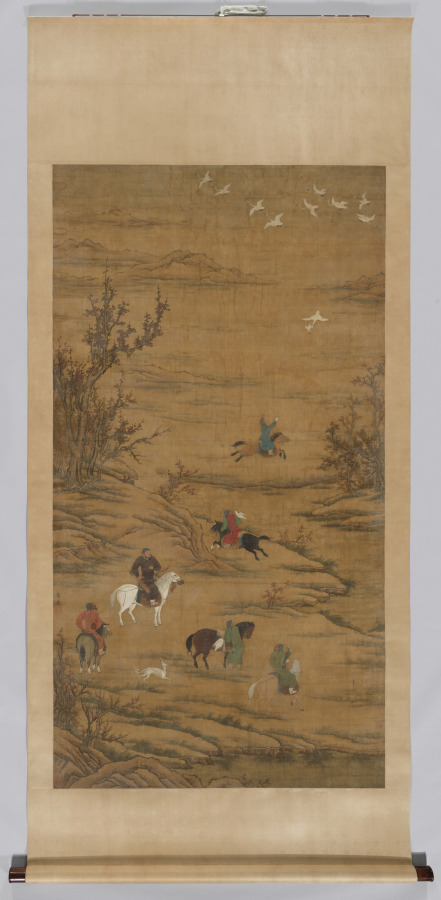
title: Hunting on Horses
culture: China, Ming dynasty (1368-1644) - Qing dynasty (1644-1911)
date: c. 1600s–1700s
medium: Hanging scroll; ink and color on silk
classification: Painting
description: This large-scale hanging scroll depicts a party hunting for waterfowl along a riverbank in the springtime. The leader is distinguished from the other five mounted hunters by his purple robe with golden dragon patterns and his white horse with a red tassel. He and his horse maintain still, dignified postures as a small white falcon captures one of the wild geese. Equestrian pursuits and hunting were particularly popular among the Khitan (also spelled “Qidan”) and Jurchen, ethnic groups who lived along China’s northeastern border. Their nomadic lifestyle intrigued the Chinese court and inspired Chinese artists to develop a painting genre showing them hunting.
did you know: This falconry scene includes one white hunting dog and four trained hunting birds.